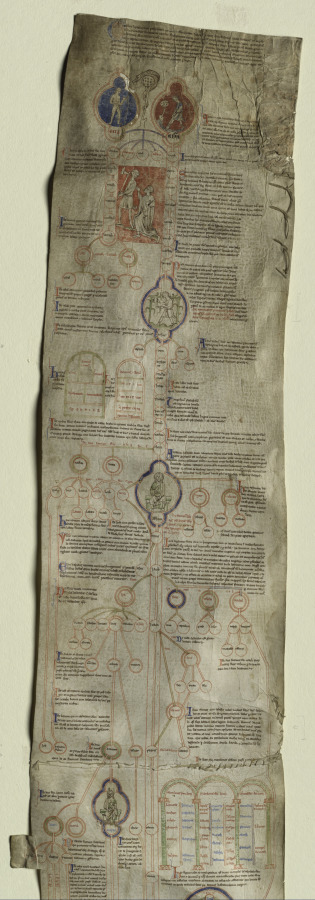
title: Peter of Poitiers's "Compendium Historiae in Genealogia Christi"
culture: England, Canterbury, 13th century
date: c. 1220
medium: ink and tempera on a vellum roll of four membranes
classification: Manuscript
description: This manuscript roll, composed of four membranes formerly stitched together in a continuous roll about nine feet long, has been divided in the middle for easier visibility and study. The text is an abridgment of biblical history focused on the descent of Christ from Adam. It was written by Peter of Poitiers (about 1130–1205), who taught theology and history in Paris and was widely copied. The present roll is an English copy of Peter's text made shortly after his death. Although manuscript rolls were hung on the walls of a classroom as instructional aids to students, some of them have value beyond their textual and historical interest because of the fine quality of their drawings, as seen here. A comparison with Canterbury manuscripts and stained glass of around 1220 is the basis for the attribution to Canterbury. Peter of Poitiers's aim in this project was to assist students prevented from mastering biblical history because of its length and because they were too poor to own books. His text on roll is the briefest possible summary of biblical history. It is arranged in six historical stages, denoting the six ages of the world, as decreed by theological tradition. The first five ages were inaugurated by Old Testament individuals: Adam, Noah, Abraham, David, and Sedecias. The birth of Christ heralded the sixth stage. Beginning at the top of the first membrane, the text consists of brief biographical entries on the ancestors of Christ (Adam, Noah, Abraham, Moses, and David) and other biblical personalities. These extend to the birth of Christ on the fourth membrane, ending with accounts of Hebrew and Roman kings and the Apostles. Each compendium shows the names of the ancestors inscribed within circles, those of direct descent placed vertically in a central column, others scattered in clusters to the right and left. The decoration of the roll consists of a series of medallions of diverse geometrical frames filled with either a figural drawing or a diagram. The style of these pen-and-ink drawings, some illuminated in tempera or tinted with wash, stems from English manuscript and glass painting attributed to the school of Canterbury Cathedral. The style of the museum's illustrations is so close to the stained glass panels made for Trinity Chapel at Canterbury (about 1220) to suggest that an artist active as a glazier in the Cathedral workshop may also have executed the manuscript. In the least, the painter of the roll manuscript was familiar with the style of the painted glass, and on this basis, a date of about 1220 seems appropriate. Additional evidence is supplied by a psalter illuminated at Canterbury shortly before 1220. The figurative scenes in this psalter were apparently illustrated by the same hand that executed the line and wash drawings in the museum's roll.